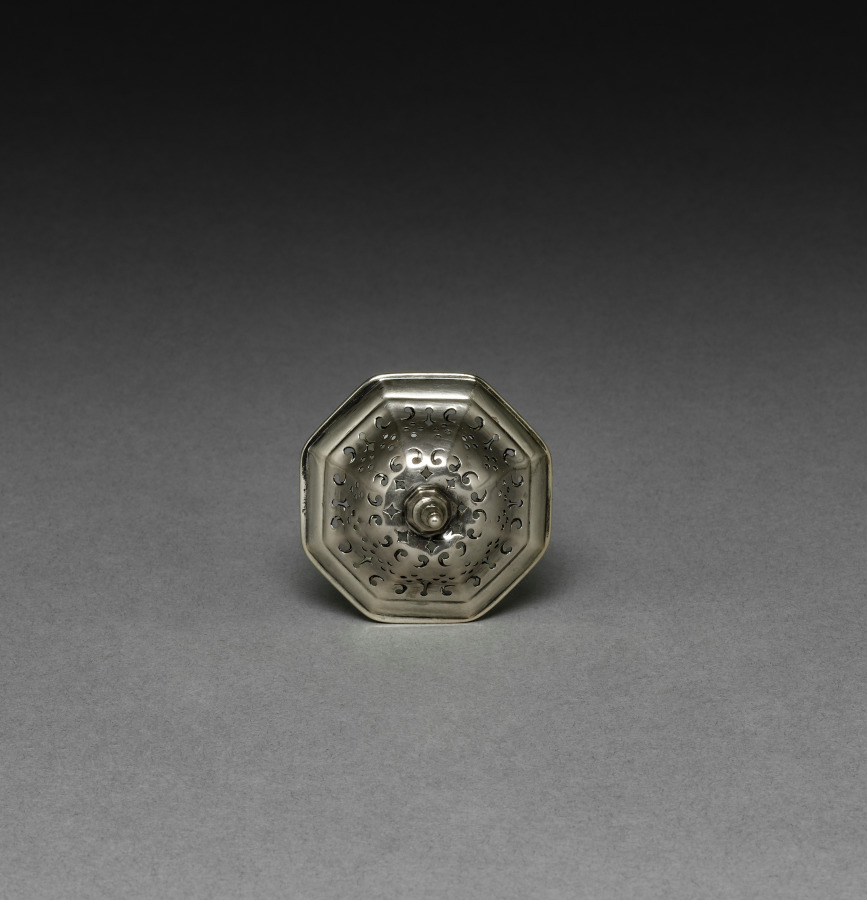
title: Caster (lid)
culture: America, Massachusetts, Boston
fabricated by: Jacob Hurd (American, 1702–1758)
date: 1743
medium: silver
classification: Silver